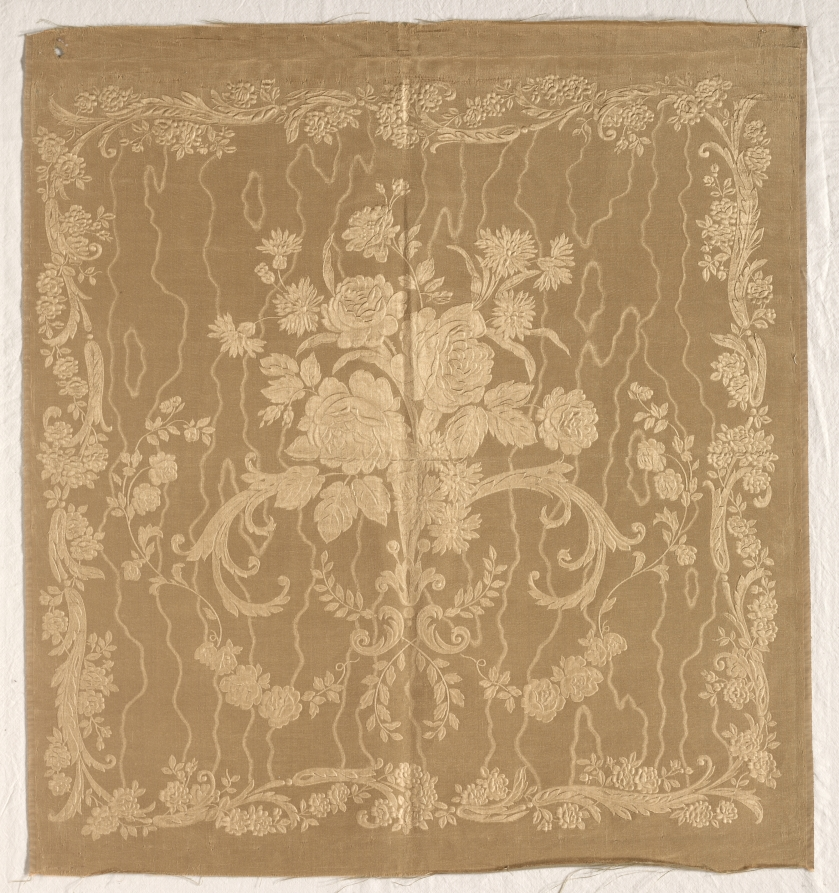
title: Square of Silk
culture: France, early 20th century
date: early 1900s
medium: gaufré on a moire ground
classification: Textile